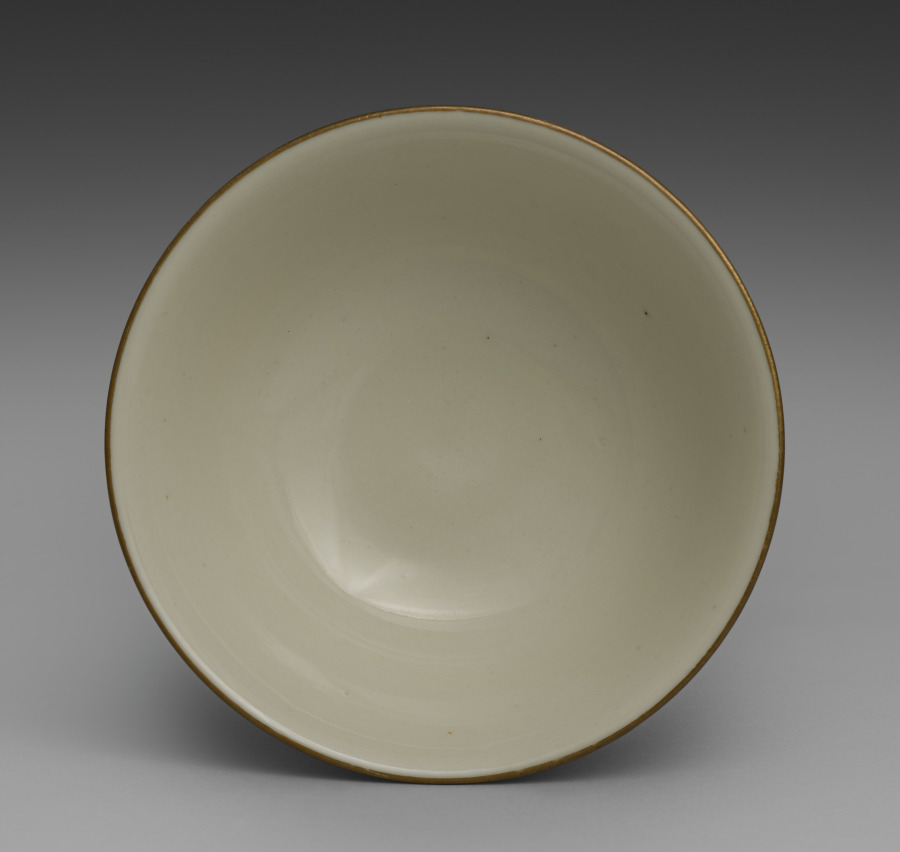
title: Bowl from Dining Set with Plum Blossoms and Cracked-Ice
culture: Japan, Meiji period (1868–1912)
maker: Seifū Yohei II (Japanese, 1844–1878)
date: c. 1875–78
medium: Porcelain with molded designs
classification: Ceramic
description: Each item in this set has a delicate low-relief design of flowering plum branches over scattered, intersecting lines meant to resemble the cracked-ice surface of a frozen body of water and is signed on the base in gold pigment. While Yohei II produced many fine works in underglaze blue, like those produced by Kiyomizu Shichibei, he also made works in quite different styles later in his career, from the early 1870 s. In 1873, he was appointed purveyor to the Industrial Center of Kyoto Prefecture, a designation associated with Kyoto’s efforts to reach an international market through the port of Kobe; and from 1875 until his death, he was involved in national-level projects to present Japanese ceramics across the world. It was during this period that Yohei III was apprenticed to Yohei II, and it has been suggested that this set may in fact be an early example of Yohei III’s work, which he signed with his teacher’s name. Decorated with flowers resembling Japanese textile motifs, the set calls to mind the design of Yohei II’s pair of vases with plum blossoms in the Victoria and Albert Museum. Here, the elaborate trees created for a formal public exhibition setting have been translated into the approachable blossoms of the genteel domestic environment. While the designs are consistent across the pieces, each raised flower petal and pistil and each incised line in the ice was done by hand, so the cups, bowls, and dishes are similar yet unique. The bottoms of two boxes once identified the set’s owner, but the information has been deliberately obscured with black ink. However, inscriptions still visible appear to indicate two occasions, once at the end of July 1886 , and once again in June 1916 , when parts of the set were requested from Hokura in Niigata Prefecture. The location corresponds to a neighborhood in the present-day city of Jōetsu. The surname Tsuji 辻 also appears on a paper tag affixed to one of the box cloths. Future research may possibly reveal more about their provenance. A vase by Yohei III in a private collection combines the formal grandeur of the Yohei II vases in the Victoria and Albert Museum with the gentler design of this dining set, placing flowering plum trees against soft, scalloped-edge clouds resembling those in golden screens.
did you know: The dining wares have a creamy white coloration that the four boxes containing them identify as Korean in style.